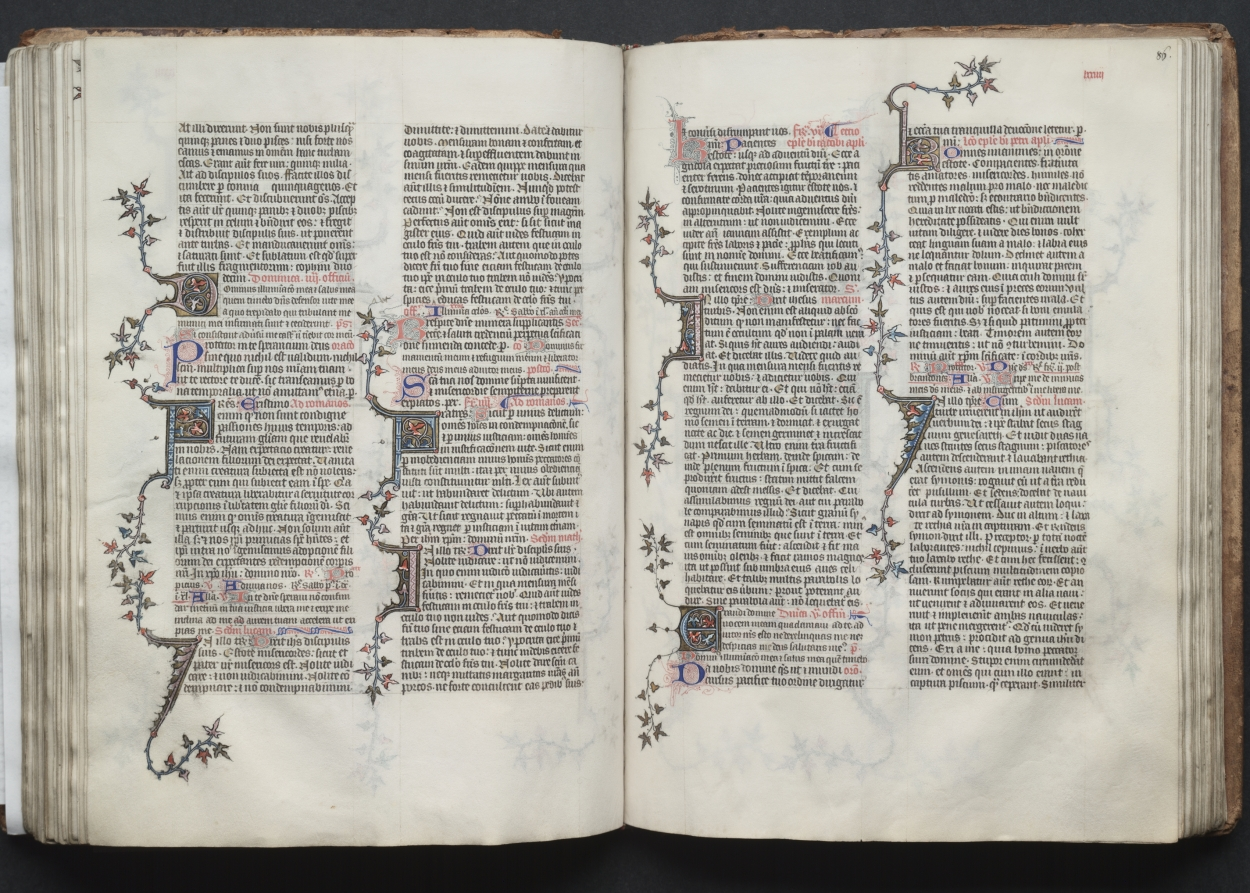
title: The Gotha Missal: Fol. 85v, Text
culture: France, Paris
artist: Master of the Boqueteaux (French)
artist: and Workshop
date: c. 1375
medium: ink, tempera, and gold on vellum; blind-tooled leather binding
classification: Bound Volume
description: The style and quality of this manuscript's decoration is typical of deluxe Parisian books made for aristocratic or royal patrons. Most of the book's decoration appears to be the work of the Master of the Boqueteaux, an artist active at the court of King Charles V (died 1380). His style was apparently shared by a number of book illuminators working in and around Paris. It is very possible that the Gotha Missal belonged to Charles V, but is not provable because the manuscript has no royal portraits and lacks a colophon. Given the book's magnificent decoration, however, it would seem that it was produced for a Valois prince, if not for the king himself. The manuscript receives its name from the German dukes of Gotha, its later owners.